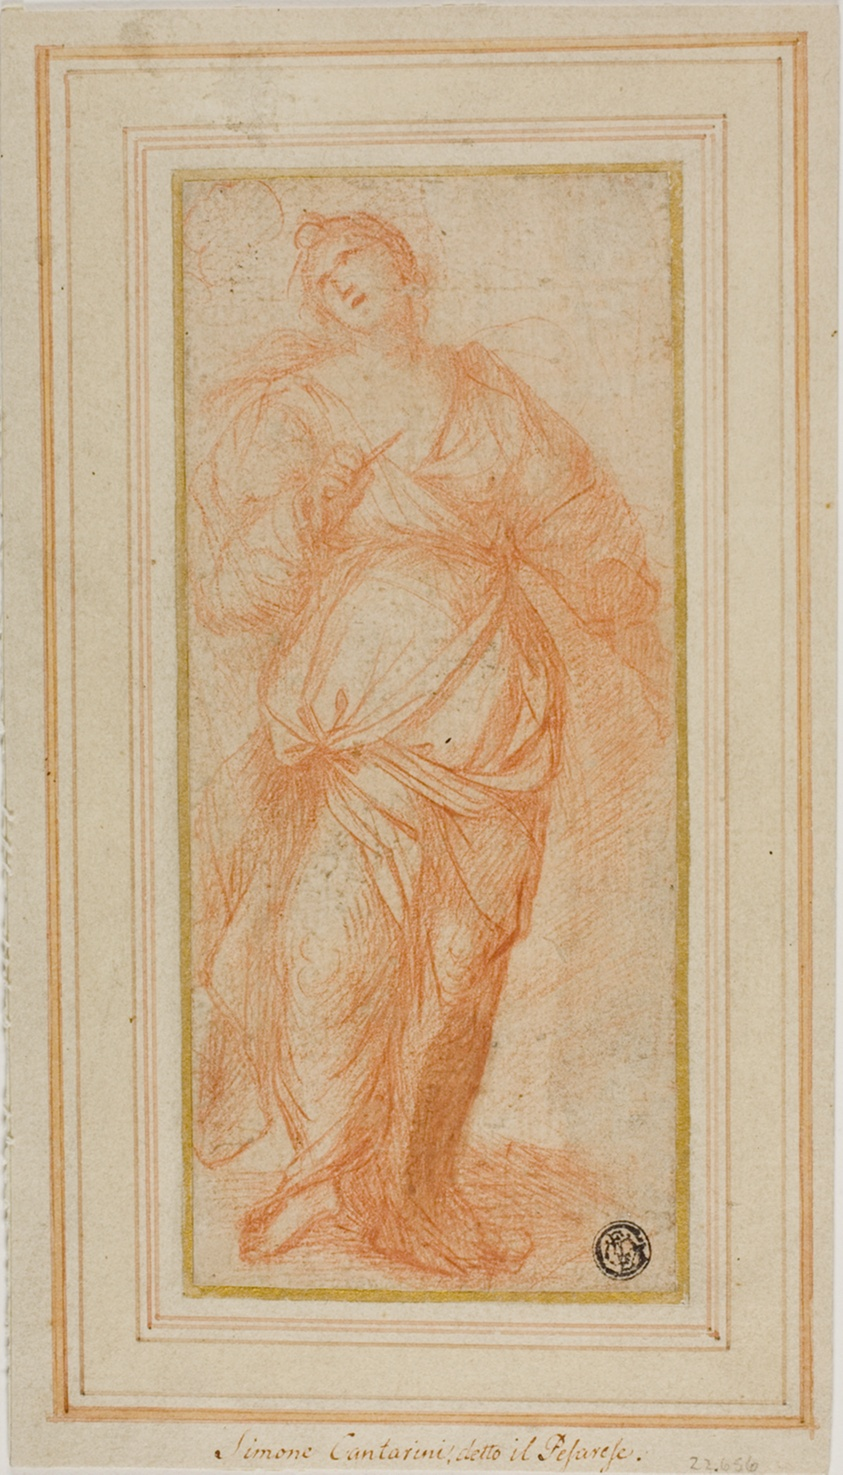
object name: Drawing and Watercolor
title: Lucretia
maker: Lorenzo Pasinelli; Italian, 1629-1700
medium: Red chalk on ivory laid paper, laid down on cream wove card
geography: Italy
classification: chalk; drawings (visual works); prints and drawing